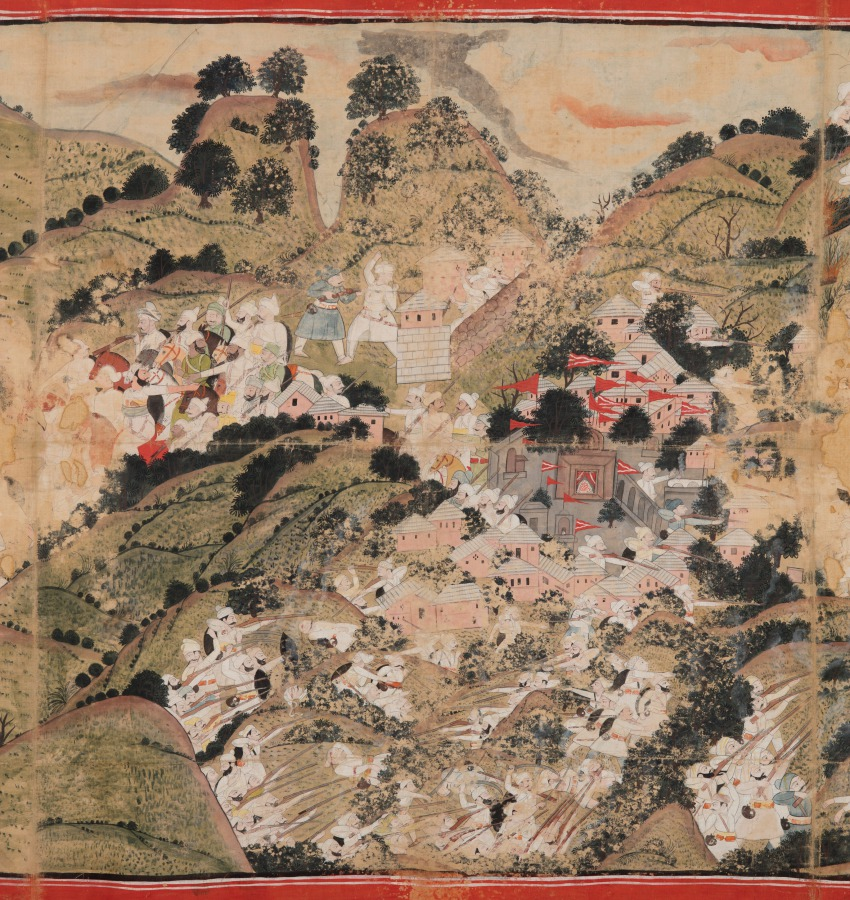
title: Raja Sansar Chand attacking Kangra Fort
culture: Northern India, Pahari kingdom of Kangra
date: after 1782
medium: Gum tempera, ink, and gold on cotton cloth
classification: Painting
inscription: Inscriptions in Takri and Persian. Persian reads: “On the 23rd of the month of Kartik, Samvat 1839 (1782 AD) Sri Maharaja Sansar Chand Bahadur attached Lakkarkot (Nagrakot ?) and the fortress of Kangra, attained victory and made siege intrenchments at the fortress of Kot Kangra.”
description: In 1782, the 17-year-old king of Kangra fought to retake his ancestral kingdom from the Mughals, who had controlled the territory since 1620. He rides a dark brown horse in front of the camel at the far right, blending in among his army and allies. The leftmost panel shows the residents of Kangra fleeing the conflict with their belongings on their heads to the safety of the fortress at the far left, from the walls where cannons are being fired. The main temple, built of gray stone, is in the middle of the composition, marked by red flags.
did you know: The king is 17 years old, beardless, riding a dark brown steed in front of the camel at the far right.